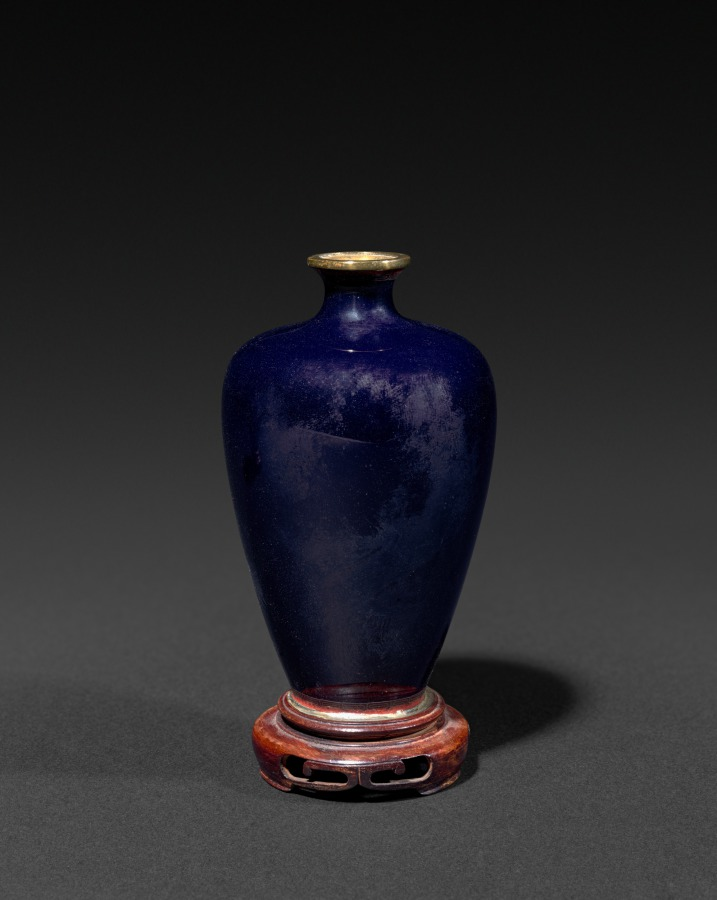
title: Vase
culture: Japan, Meiji period (1868–1912) to Taishō period (1912–26)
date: early 1900s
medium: One of a pair; cloisonne with carved wood base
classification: Enamel